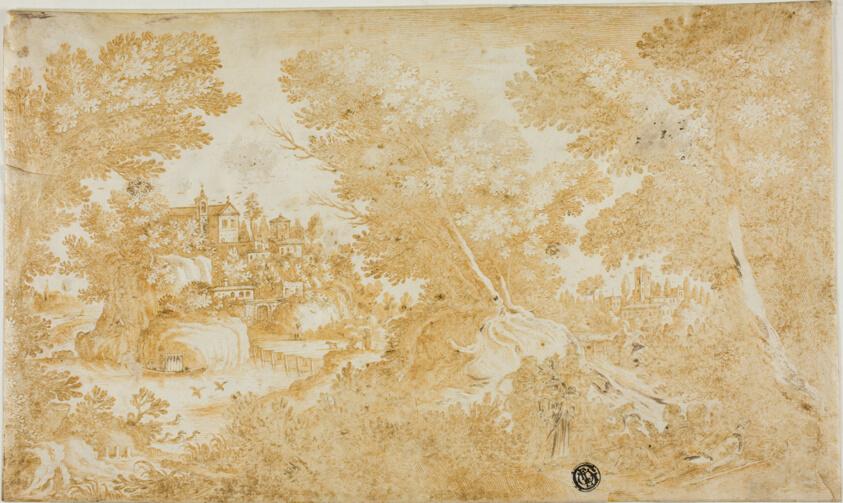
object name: Drawing and Watercolor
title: Men and Women Resting in Wooded Landscape with River, Villas, Church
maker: Style of Hendrik Hondius I; Dutch, 1573-1650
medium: Pen and brown ink, with brush and brown wash, on parchment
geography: Netherlands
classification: pen and ink drawings; drawings (visual works); prints and drawing